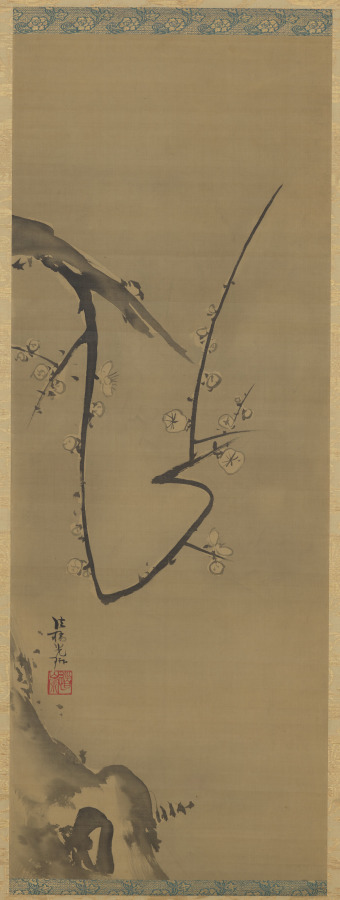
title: Plum Tree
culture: Japan, Edo period (1615–1868)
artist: Ogata Kōrin (Japanese, 1658–1716)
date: c. 1700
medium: hanging scroll; ink on silk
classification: Painting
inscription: Artist's signature and seal above hillock bottom right corner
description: Ogata Kōrin had to think through his design carefully to create these white plum blossoms and deliver their effect, as he used the reserve technique—where selected areas of the painting surface are left unpainted—to achieve it. He probably roughed in the tree before applying an ink wash to the entire silk surface, except where he intended to place the flowers. He likely then returned to articulate the petals and, in some cases, the pistils and stamens. The composition shows the tree twisting out of view, only to return with a branch of new growth jabbing forth from an old, broken limb, thereby heightening the visual impact of the blossoms.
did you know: The Rinpa style of painting is named for Ogata Kōrin, even though he did not create it.